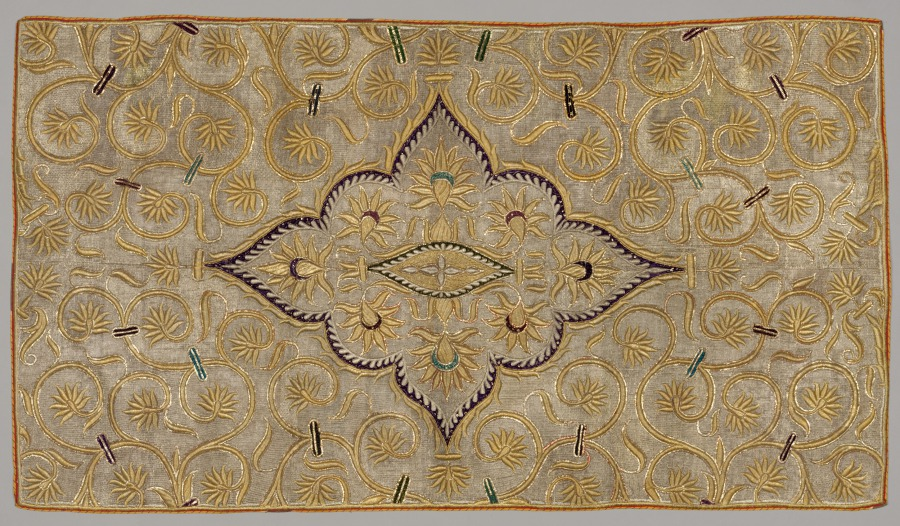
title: Embroidered Cover (?)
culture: India, 18th-19th century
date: 1700s - 1800s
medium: embroidery; silk and metallic threads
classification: Embroidery